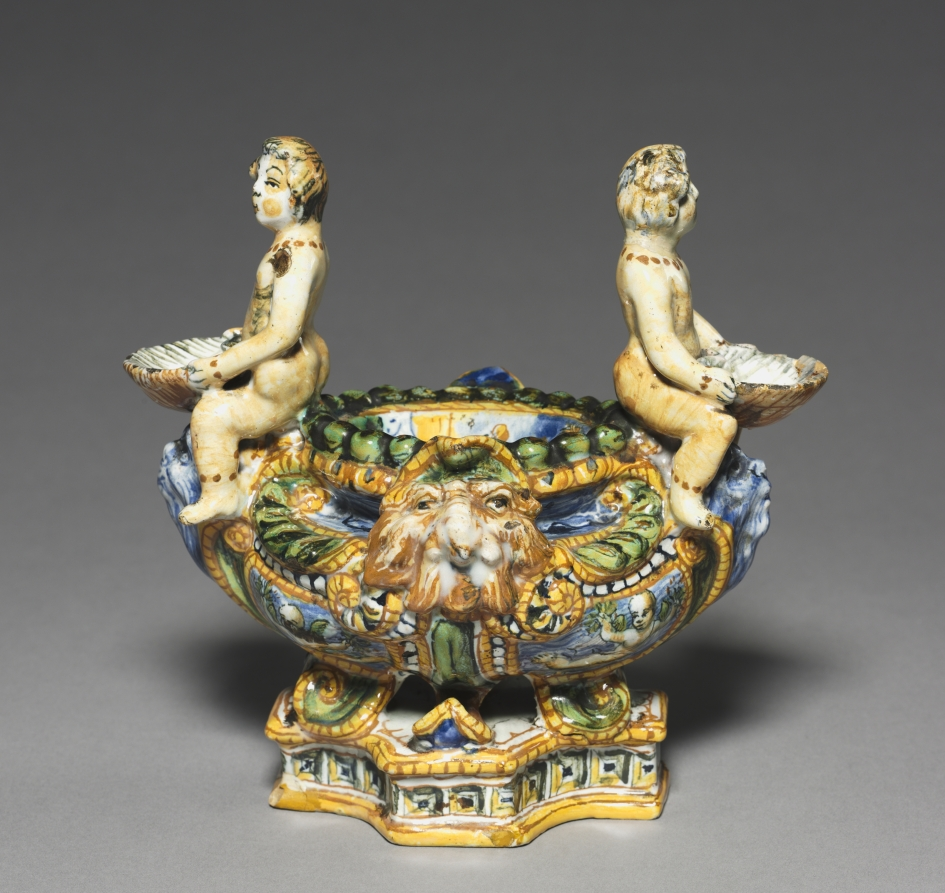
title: Saltcellar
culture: Italy, Urbino, 16th century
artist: circle of the Patanazzi Family (Italian)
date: c. 1570–90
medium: tin-glazed earthenware (maiolica)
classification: Ceramic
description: During the Italian Renaissance of the 1400s and 1500s, nobles and merchants eager to express their wealth and sophistication ordered ceramics for dining, display, and storage. Known as maiolica, because it resembled the brightly colored ceramics from the Mediterranean island of Majorca, these ceramic vessels were covered with a tin glaze that provided an opaque white surface on which colorful decoration could be painted.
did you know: During the Renaissance, salt was an expensive commodity and was used to both season and preserve food.